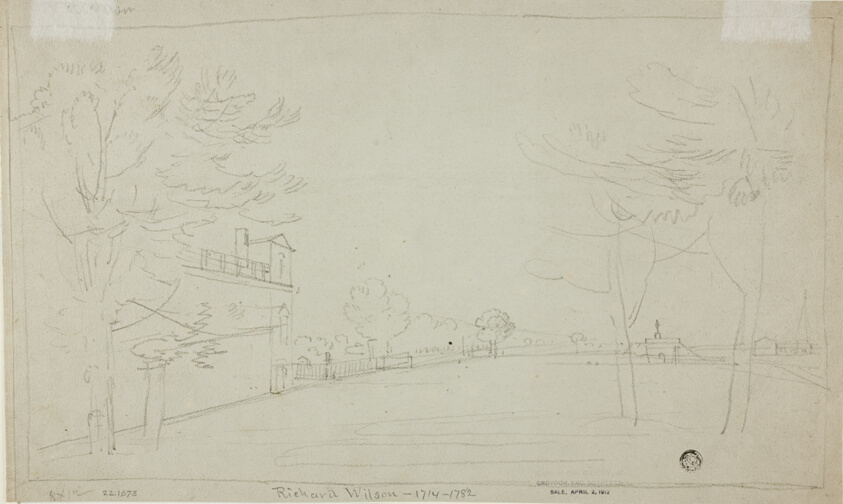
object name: Drawing and Watercolor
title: Landscape with Woman and Cows (recto); Sketch of a Landscape (verso)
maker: Richard Wilson (English, 1714-1782); or Thomas Morro (English, 1759-1833); or George Frost (English, c. 1754-1821); or the style of Thomas Gainsborough (English, 1727-1788)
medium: Black chalk with stumping, heightened with white chalk (recto), and black chalk (verso), on blue laid paper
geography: England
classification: chalk; drawings (visual works); prints and drawing